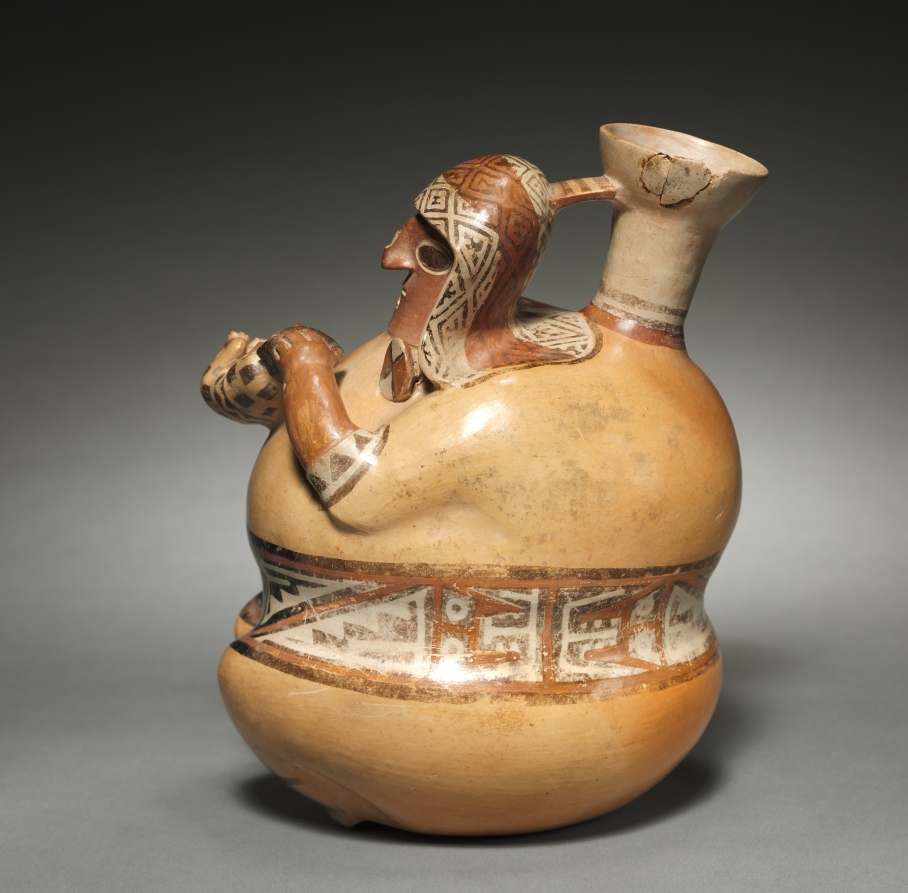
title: Mother-and-Child? Vessel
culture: Central Andes, North Highlands, Recuay people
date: 1–700 CE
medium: ceramic, slip, pigment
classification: Sculpture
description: Well-dressed, important women like this one are depicted fairly often in Recuay art. These women hold a variety of things, ranging from cups that may refer to feasts held on important political occasions to small figures commonly interpreted as children, as here. These and other representations have led scholars to suggest that Recuay women held authority independent of their male partners; their authority may have stemmed in part from involvement in feasting celebrations.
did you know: Recuay ceramics typically use only three colors: black, white, and red.